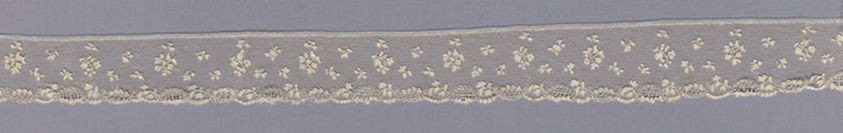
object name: Textile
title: Border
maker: France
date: 1775/1800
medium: Linen, needle lace of a type known as "Point d'Argentan" with buttonholed mesh ground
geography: France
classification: textile; lace - needle